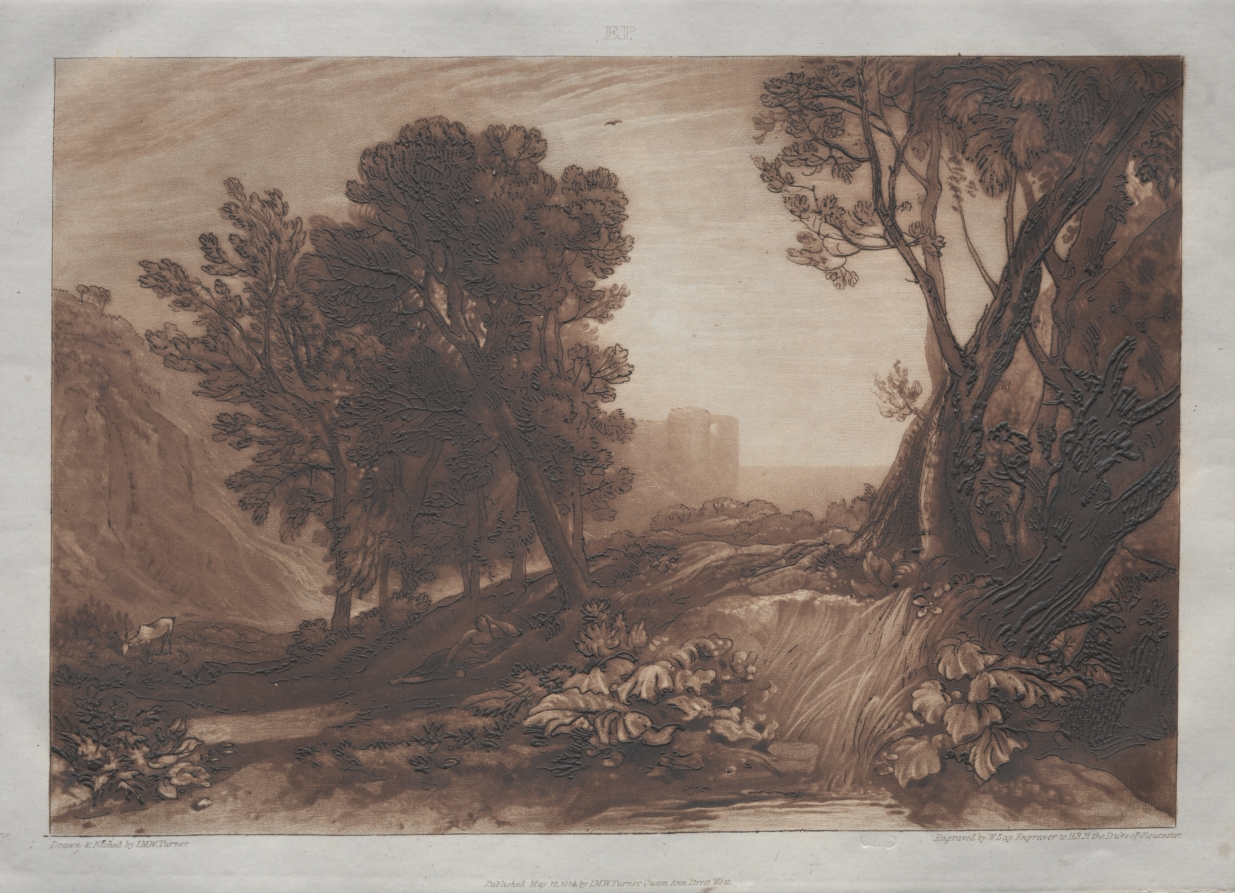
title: Solitude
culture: England, 19th century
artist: Joseph Mallord William Turner (British, 1775–1851)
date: 1814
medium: etching and mezzotint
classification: Print